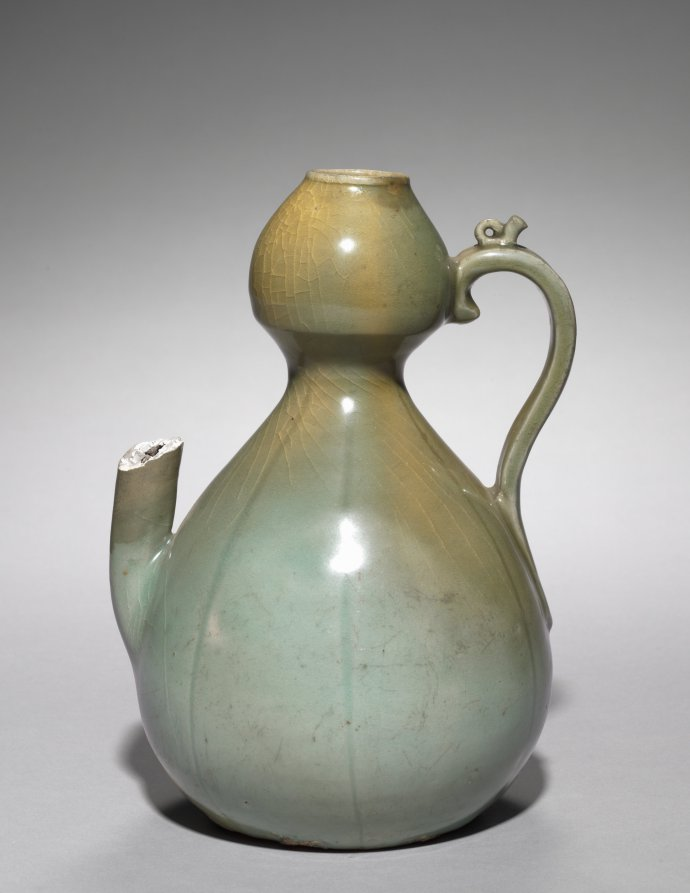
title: Gourd-shaped Wine Pot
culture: Korea, Goryeo dynasty (918–1392)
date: 1200s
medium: pottery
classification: Ceramic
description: As early as the seventh century, the practice of drinking tea and wine became an important part of elite culture in Korea. Elites of the Goryeo period commissioned a variety of types of utensils and vessels including this elegant wine pitcher, not only to make their drinking experience more exciting, but also to show their appreciation of nature.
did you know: This gourd-shaped bottle once used to serve wine.